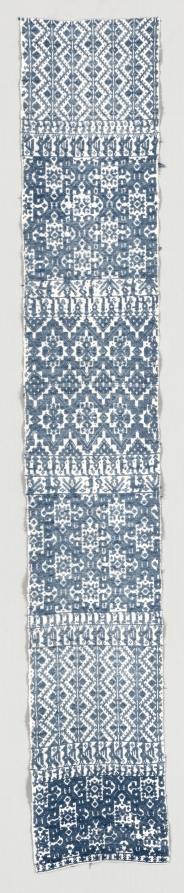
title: Woven Textile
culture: Italy, Sardinia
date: 18th century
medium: cotton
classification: Textile